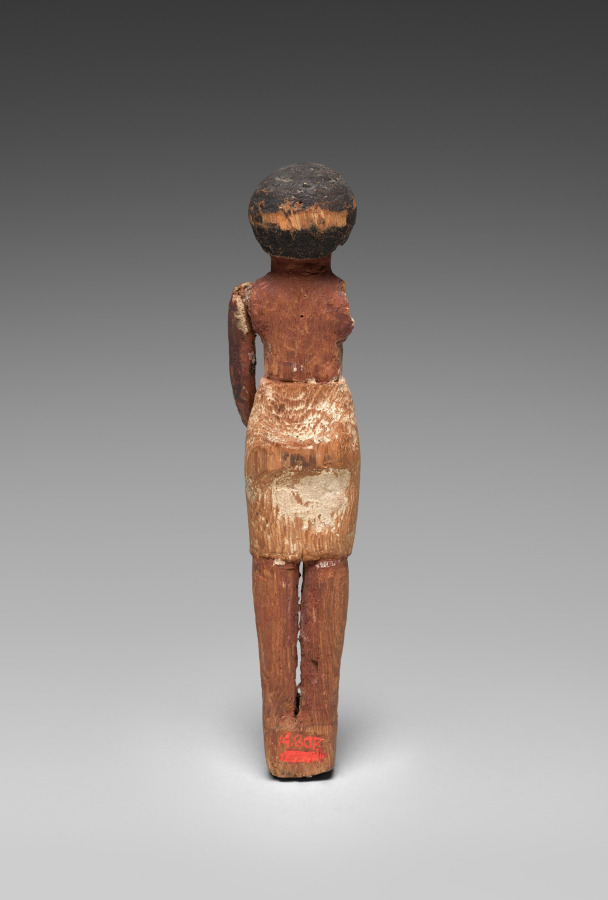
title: Model Figure of a Man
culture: Egypt, Middle Kingdom (2040–1648 BCE), Dynasty 12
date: 1980–1801 BCE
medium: painted wood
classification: Funerary Equipment